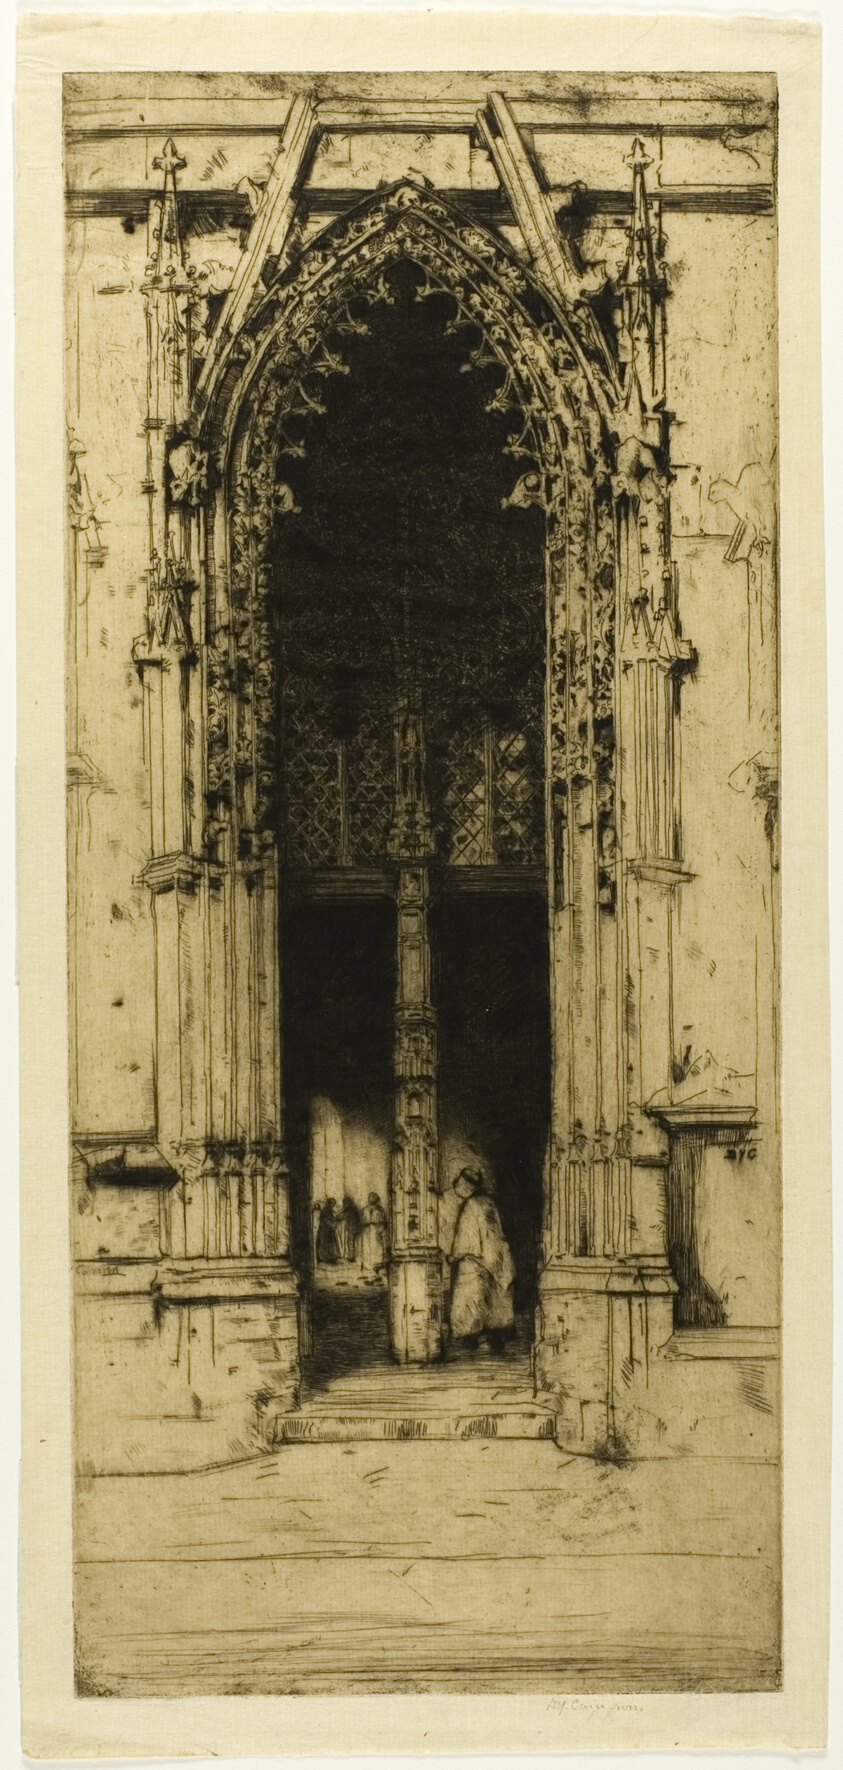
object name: Print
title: The North Porch, Harfleur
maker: David Young Cameron (Scottish, 1865-1945)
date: 1904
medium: Etching, with touches of drypoint, on ivory laid paper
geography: Scotland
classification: etching; print; prints and drawing